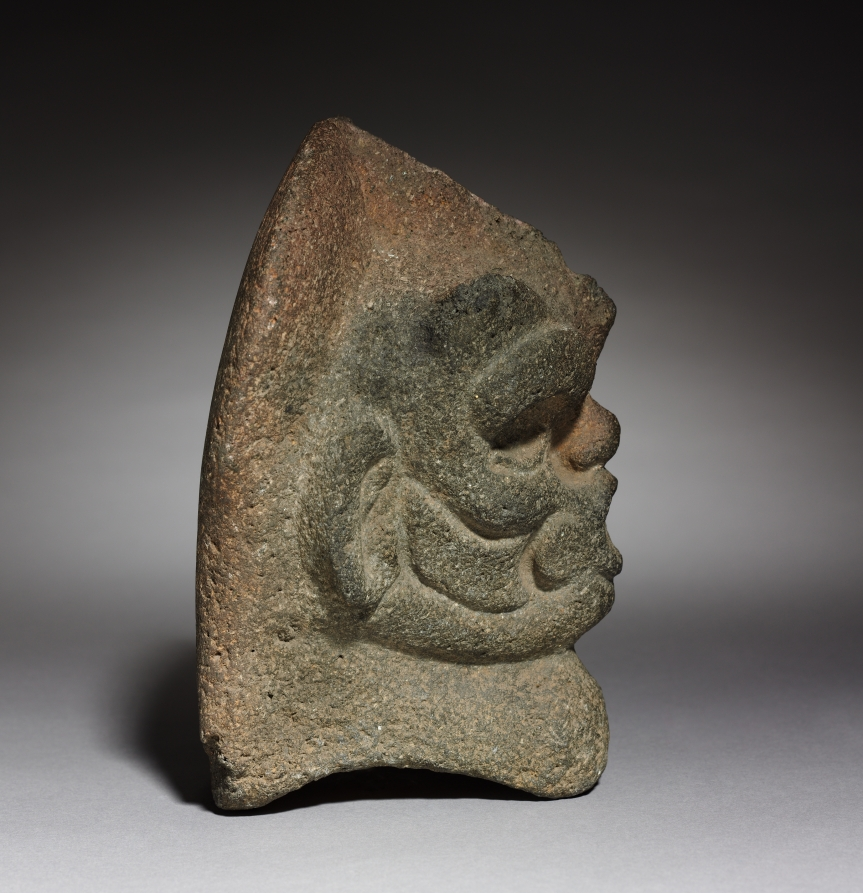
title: Head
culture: Mexico, Classic Veracruz (Totonac or Tajin)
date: 600–1100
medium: stone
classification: Sculpture